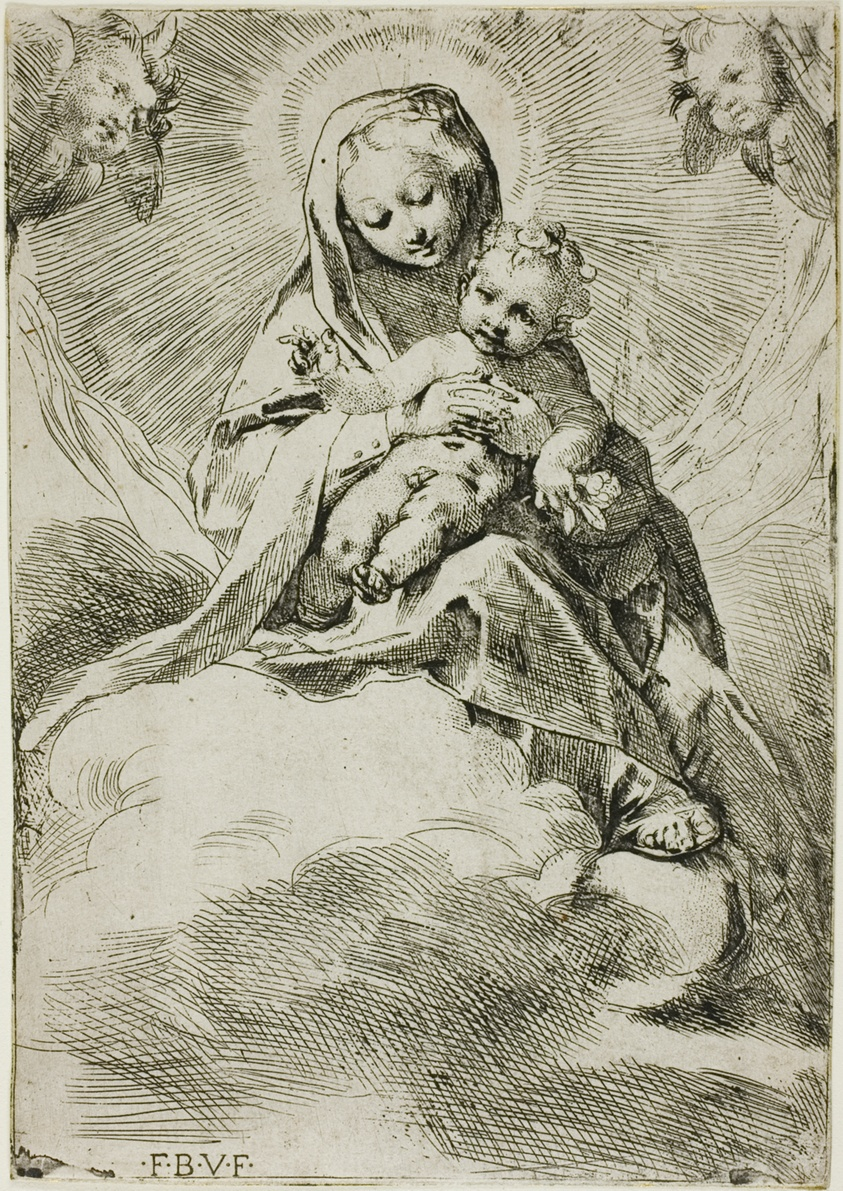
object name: Print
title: Madonna and Child on Clouds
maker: Federico Barocci (Italian, 1526/28-1612)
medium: Etching in black on cream laid paper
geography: Italy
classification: print; prints and drawing